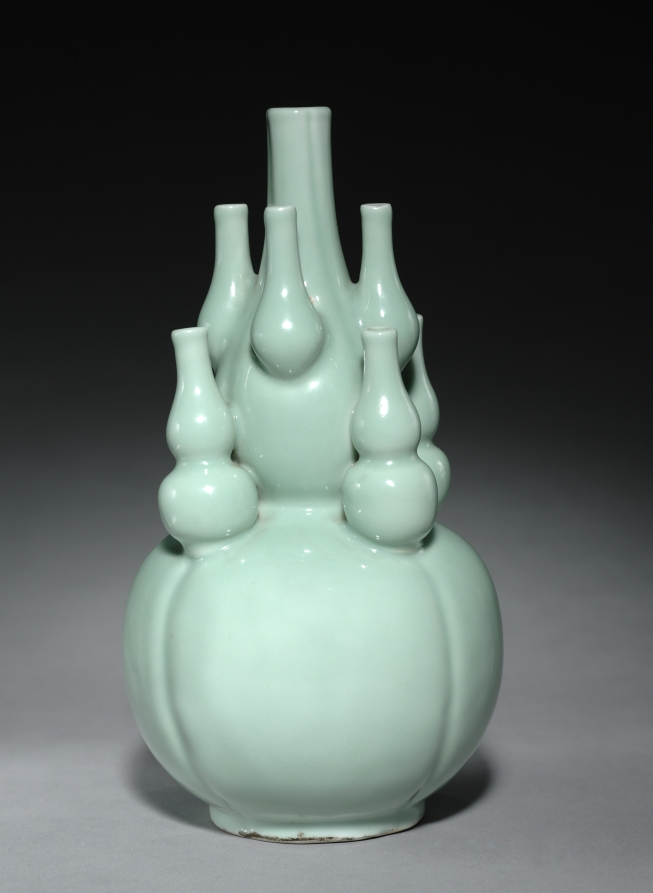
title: Double-gourd Shaped Bottle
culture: China, Qing dynasty (1644–1911), Qianlong mark and reign (1736–95)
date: 1736–95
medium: porcelain with celadon glaze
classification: Ceramic